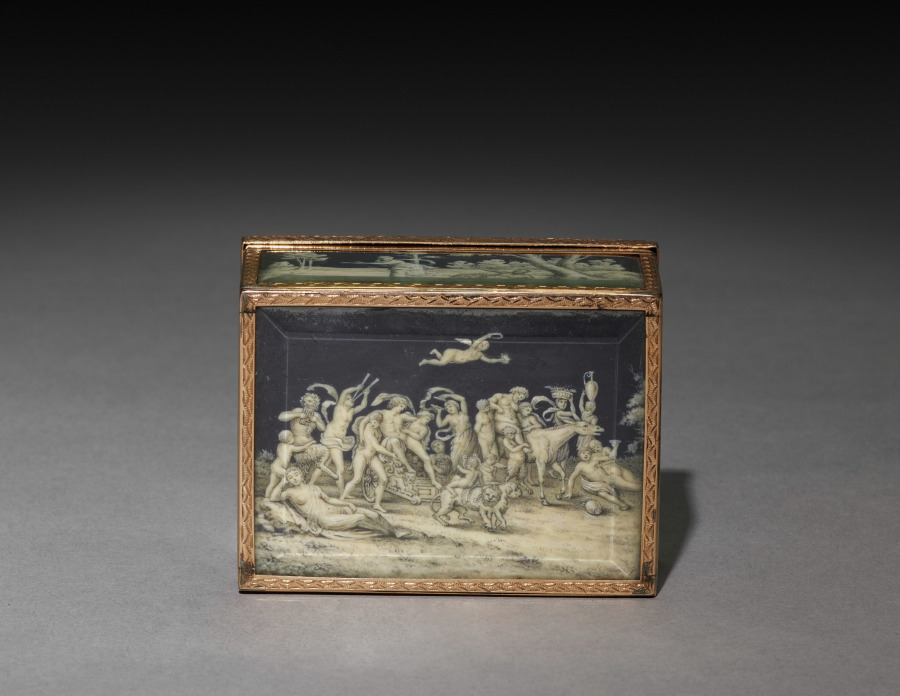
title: Box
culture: France, 19th century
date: 1800s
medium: painted miniatures under glass mounted in gold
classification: Miscellaneous